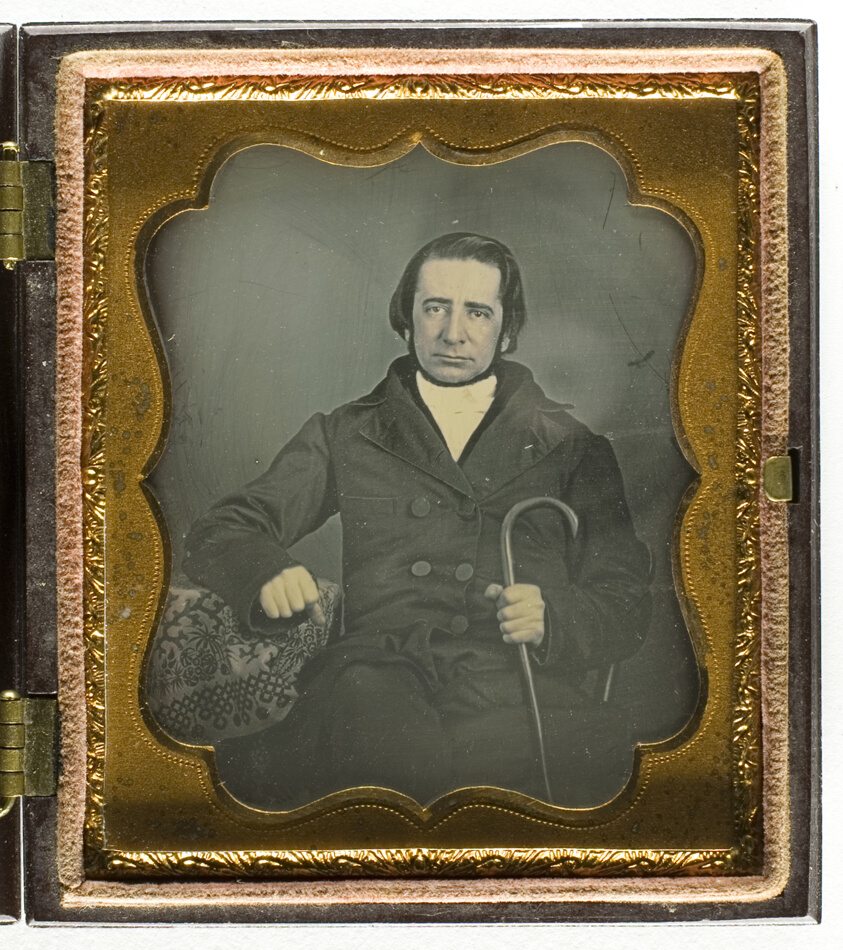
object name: Photograph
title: Untitled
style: 19th century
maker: Artist unknown; 19th century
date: 1839/60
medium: Daguerreotype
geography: Unknown Place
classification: daguerreotype; photographic process; photography; photograph